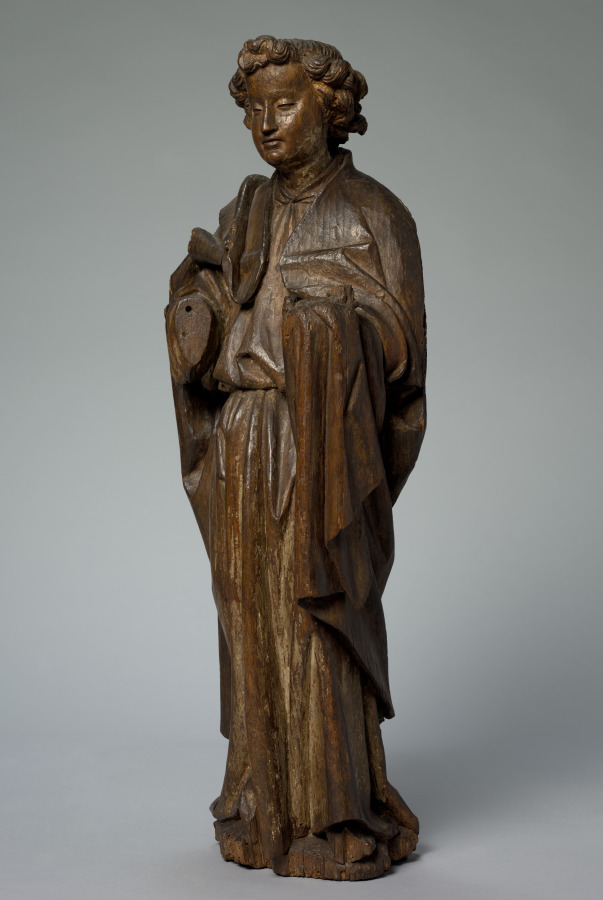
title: Angel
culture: Bruges?, Belgium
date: c. 1430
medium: oak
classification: Sculpture